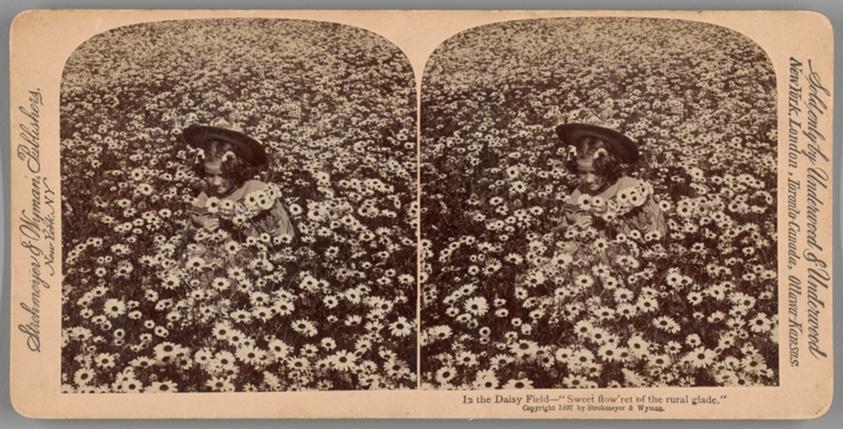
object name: Photograph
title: In the Daisy Field - "Sweet flow'ret of the rural glade"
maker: Underwood & Underwood (American, active 1881-1920)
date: 1897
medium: Albumen print, stereo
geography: New York City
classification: photography; photograph